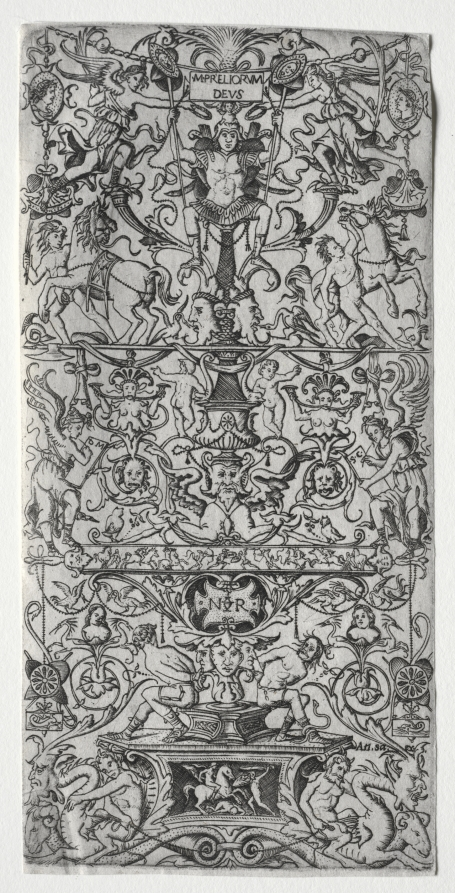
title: Ornament Panel: Mars, God of Battles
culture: Italy, 16th century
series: Four Ornament Panels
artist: Nicoletto da Modena (Italian, active c. 1500–1520)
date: c. 1507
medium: engraving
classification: Print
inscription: upper center, in plate: ·M·PRELIORUM / DEVS ; lower center in plate: N R ; lower right, in plate: An. sa. ex.